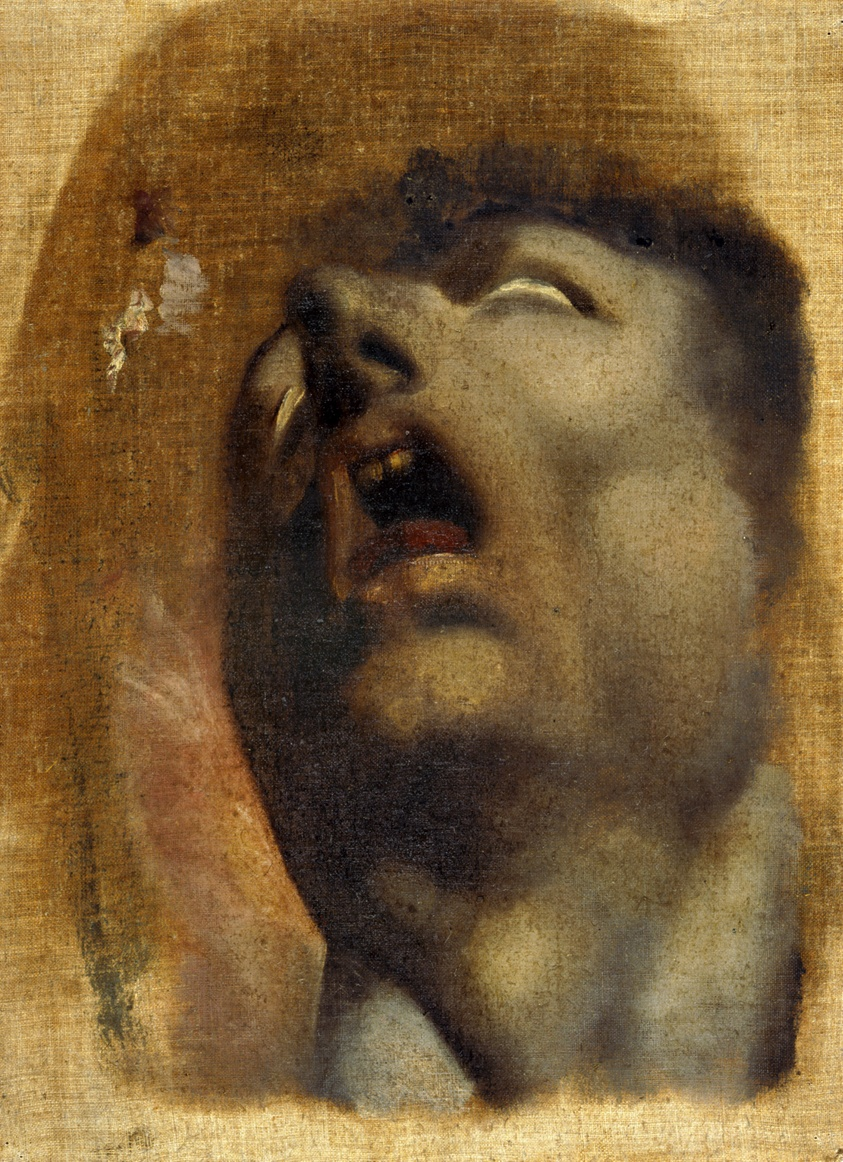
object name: Painting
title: Two Heads of Damned Souls from Dante's "Inferno" (front and back)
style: 18th Century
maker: Henry Fuseli (Swiss, active in England, 1741–1825)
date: 1770/78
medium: Oil on canvas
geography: England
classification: oil on canvas; oil paintings (visual works); paint; painting; european painting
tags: faces, sketch, study, studies, death, figures